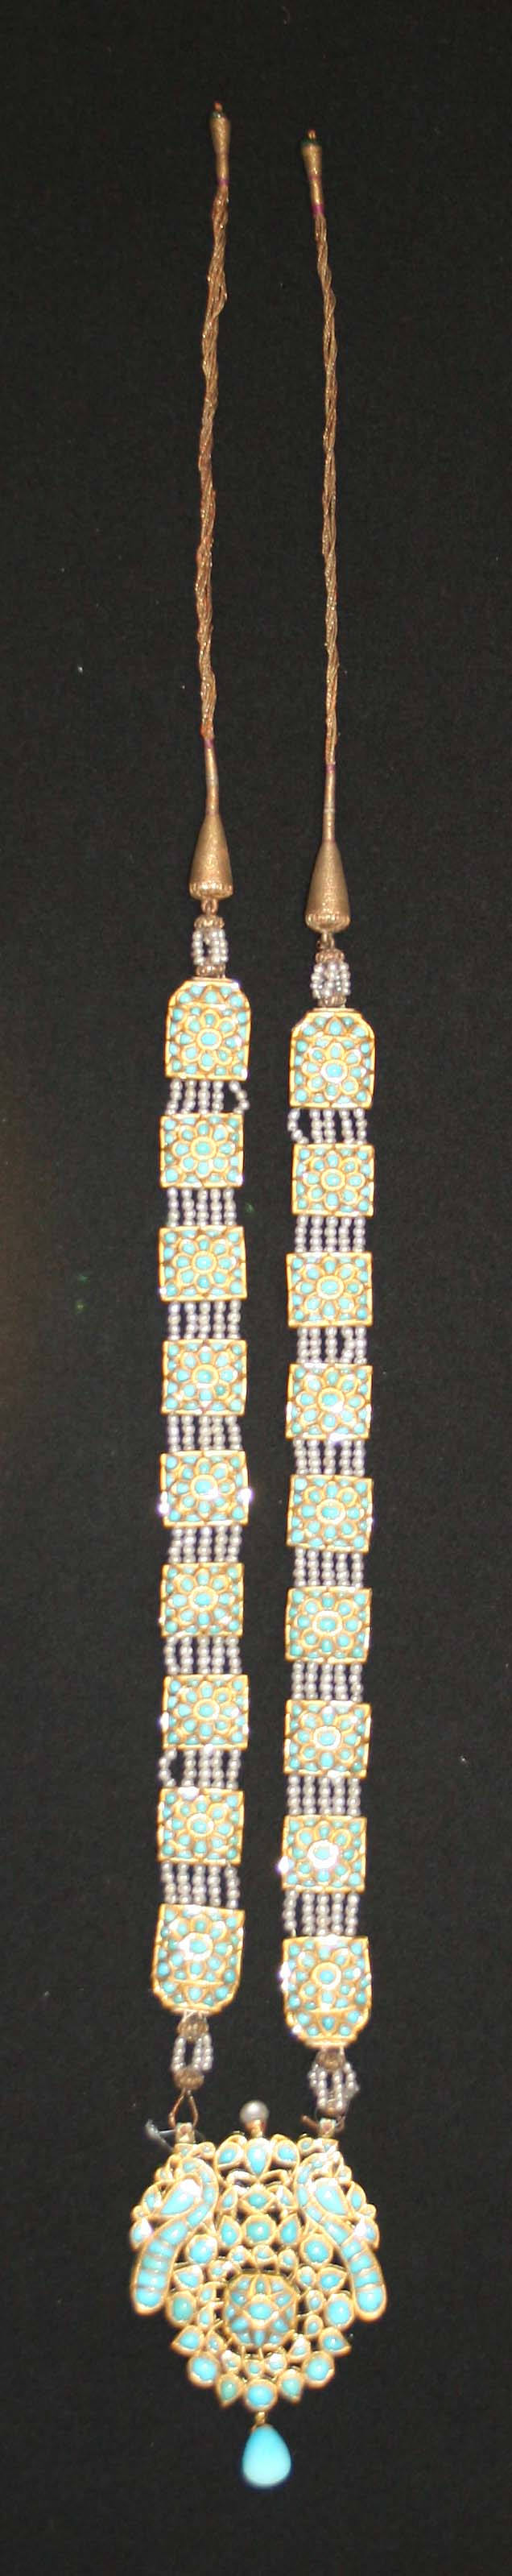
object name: Costume and Accessories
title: Necklace (Patrihar)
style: South Asian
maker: India; Rajasthan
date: 19th century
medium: Turquoise, gold, and seed pearls inset in the kundan technique, with polychrome enamel (minakari)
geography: India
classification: jewelry; asian art; costume